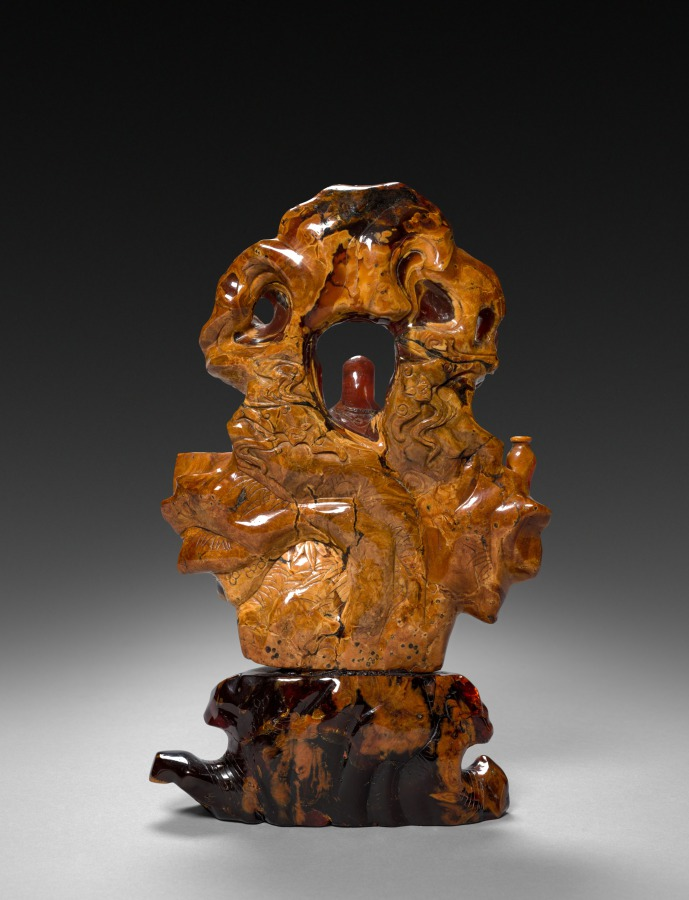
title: Bodhisattva Guanyin Seated in a Rock Grove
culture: China, Qing dynasty (1644-1911)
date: 1675–1700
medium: opaque ochre and translucent red-orange amber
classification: Sculpture